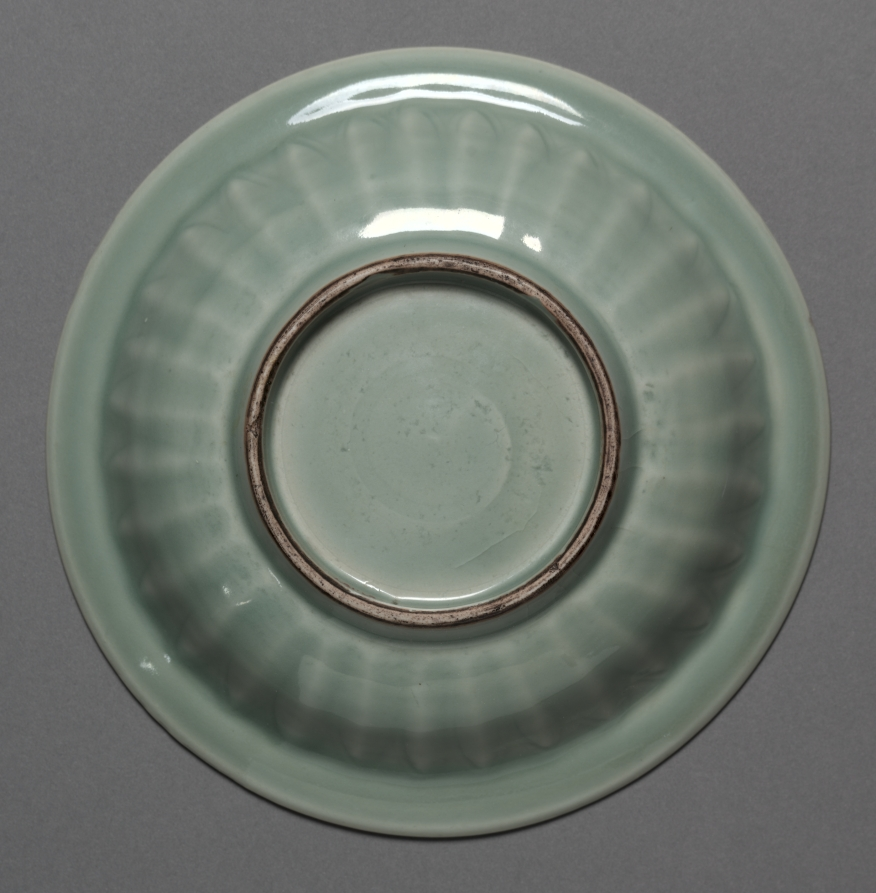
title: Dish with Two Fish in Relief: Longquan Ware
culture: China, Zhejiang province, Southern Song dynasty (1127-1279)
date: mid-1200s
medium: glazed porcelain with molded decoration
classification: Ceramic